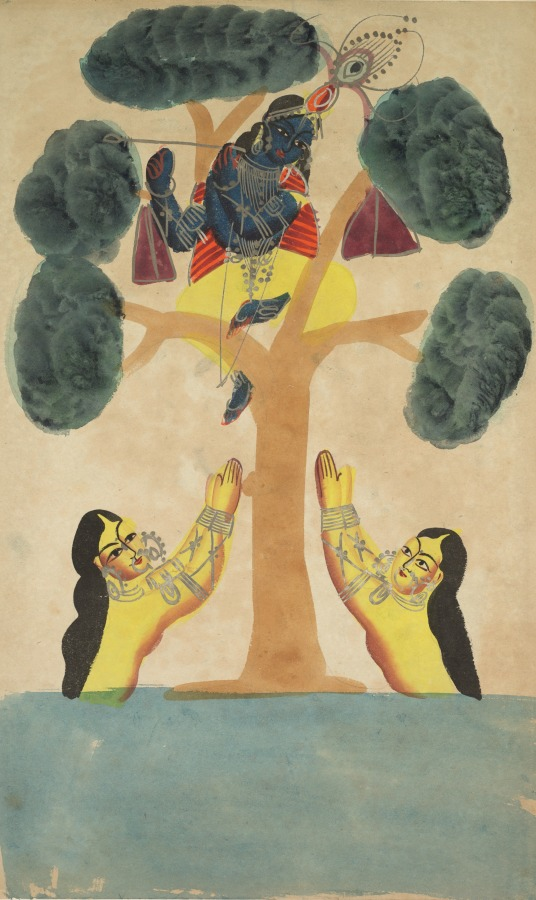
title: Krishna Steals the Clothes of the Cowgirls (Gopis) (recto), from a Kalighat album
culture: Eastern India, Bengal, Kolkata, Kalighat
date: c. 1890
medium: Gum tempera, graphite, ink, and tin on paper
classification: Painting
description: In this image taken from both popular accounts and the Bhagavata Purana, Krishna has stolen the clothes of cowgirls (gopis) who are bathing in the Yamuna River, a tributary of the Ganges River. He refuses to return their clothes, the purple saris seen hanging high in the tree, until they come out and bow to him with folded palms. Krishna, a cowherder, is holding a flute, which he uses to lure them away.